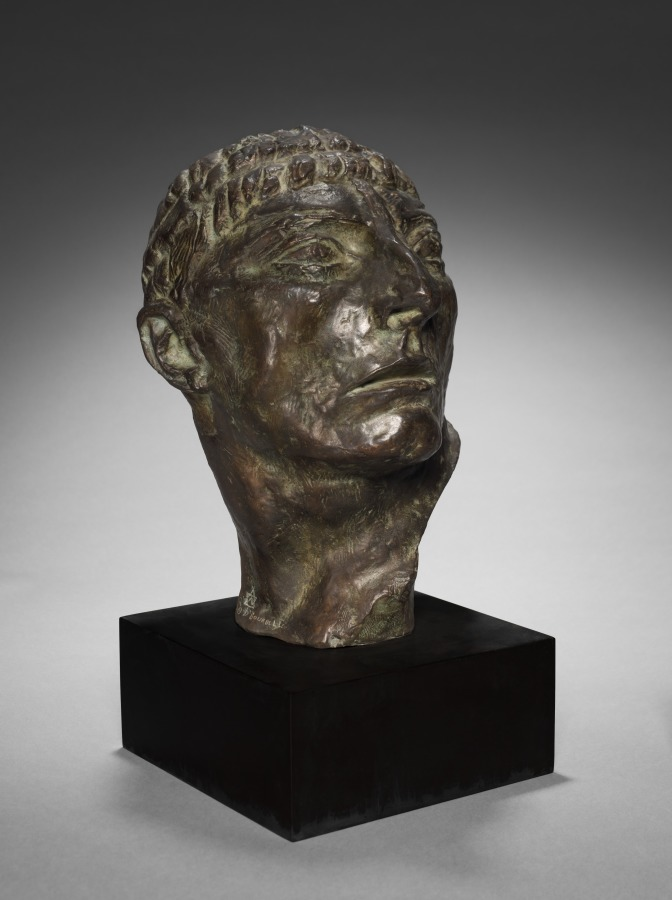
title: Mask of Hercules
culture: France, 20th century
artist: Emile Antoine Bourdelle (French, 1861–1929)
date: 1909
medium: bronze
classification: Sculpture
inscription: Inscribed at neck, lower left: "© Bourdelle"; beneath right ear: "E. Godard/Fondr Paris / 7"